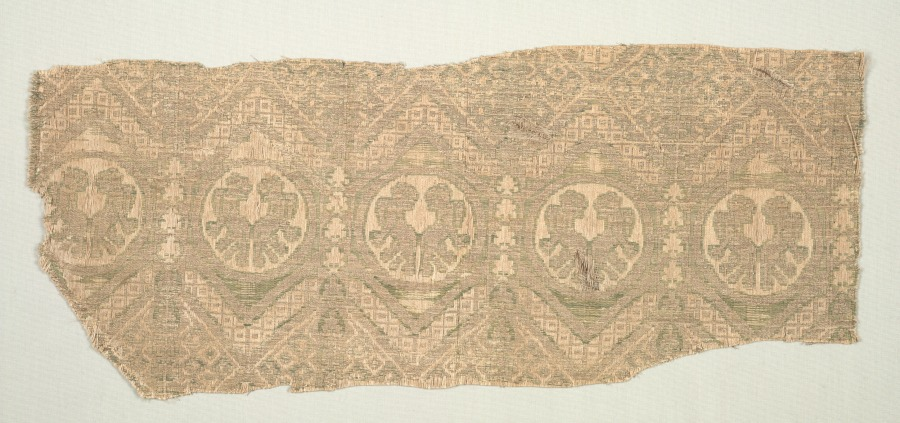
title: Textile Fragments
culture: Spain, Mudejar, 13th century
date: 13th century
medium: compound twill: silk, gold and linen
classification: Textile